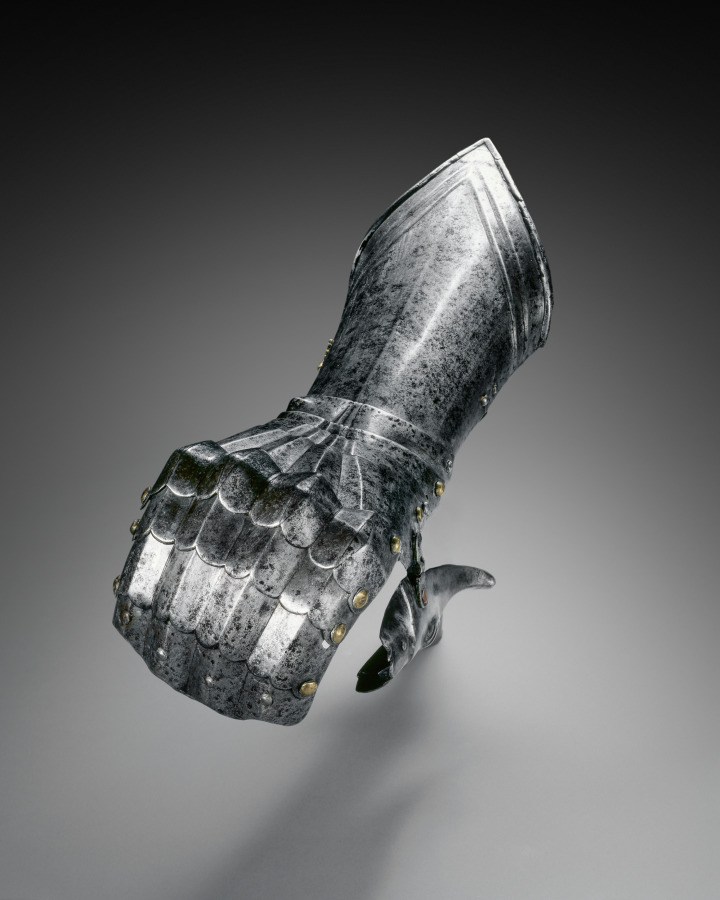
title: Gothic Mitten Gauntlet for the Right Hand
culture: South Germany or Austria (Innsbruck), late 15th Century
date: c. 1490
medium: steel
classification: Arms and Armor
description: The forging of steel, a very hard material, into precisely fitted, interconnected plates was a task that required great skill and patience. The elements of a suit were never riveted directly together which would make them inflexible. Instead they slightly overlapped and were attached by different types of rivets.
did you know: Embossed decoration adds beauty to this gauntlet that would have protected the hand.